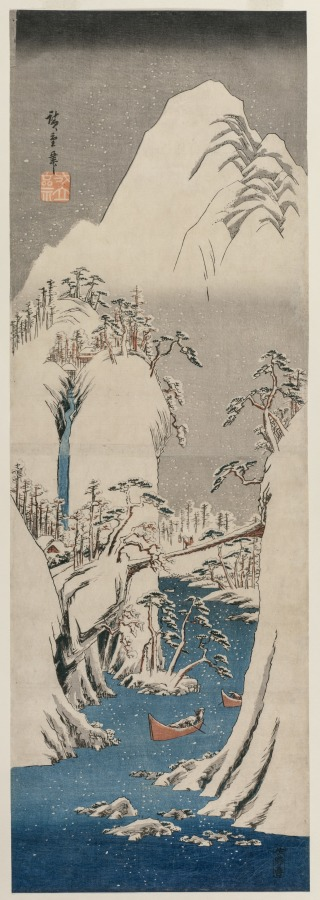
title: The Fuji River in the Snow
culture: Japan, Edo period (1615–1868)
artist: Utagawa Hiroshige (Japanese, 1797–1858)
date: 1841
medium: color woodblock print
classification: Print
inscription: Signature: Hiroshige hitsu Artist Seal: Ichiryusai Publisher: Sanoya Kihei (Sanoki)